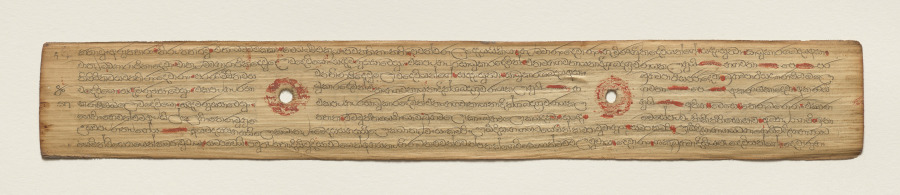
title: Leaf from a Buddhist Manuscript (recto)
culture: Sri Lanka, Singhalese, Late 17th century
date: c. 1700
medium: fiber paper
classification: Manuscript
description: Palm leaf material is still used for manuscripts in Sri Lanka. The palm leaves are prepared first by boiling them, drying them in the sun, and then rubbing them with oils. Scribes then use a metal stylus to incise the text. Then charcoal powder is wiped across the pages, filling in only the inscribed lines.